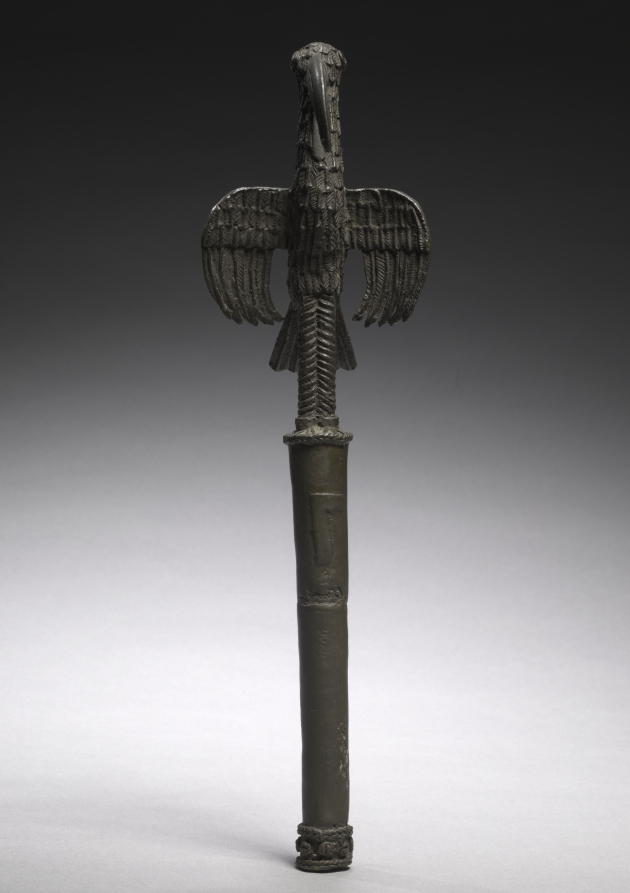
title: Idiophone/Staff (ahianmwẹn-ọrọ)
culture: Nigeria, Benin Kingdom, Ẹdo peoples, members of the Igun Eronmwon (royal brasscasters) guild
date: possibly 1800s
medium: Copper alloy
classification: Sculpture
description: Courtiers, priests, and senior chiefs strike instruments like this during the Ugie Ọrọ festival. The long-legged metal bird refers to the 16th-century ruler Ọba Ẹsigie. Wings outstretched with long, textured feathers, it is the ahianmwẹn-ọrọ (bird of prophecy). It stares outward, a likely magical substance clenched in its beak. Such a bird prophesied Ẹsigie’s defeat and death during the Idah War (about 1515–17), leading his people to resist fighting for him. When Ẹsigie triumphed, bronze bird effigies were beaten for days on end throughout the year. This punished the false avian prophet and shamed the cowardly men.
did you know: An image of the ahianmwẹn-ọrọ (bird of prophecy) once sat atop the roof of the palace in the Benin Kingdom.